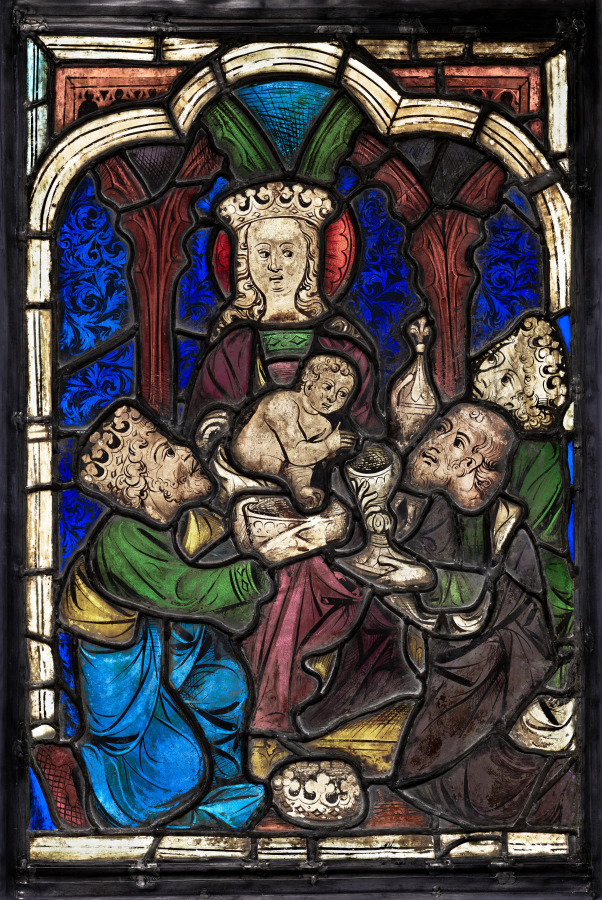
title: The Adoration of the Magi from the Parish Church of Maria am Waasen in Leoben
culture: Austria, Styria, 15th century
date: c. 1410–20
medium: stained glass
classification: Glass